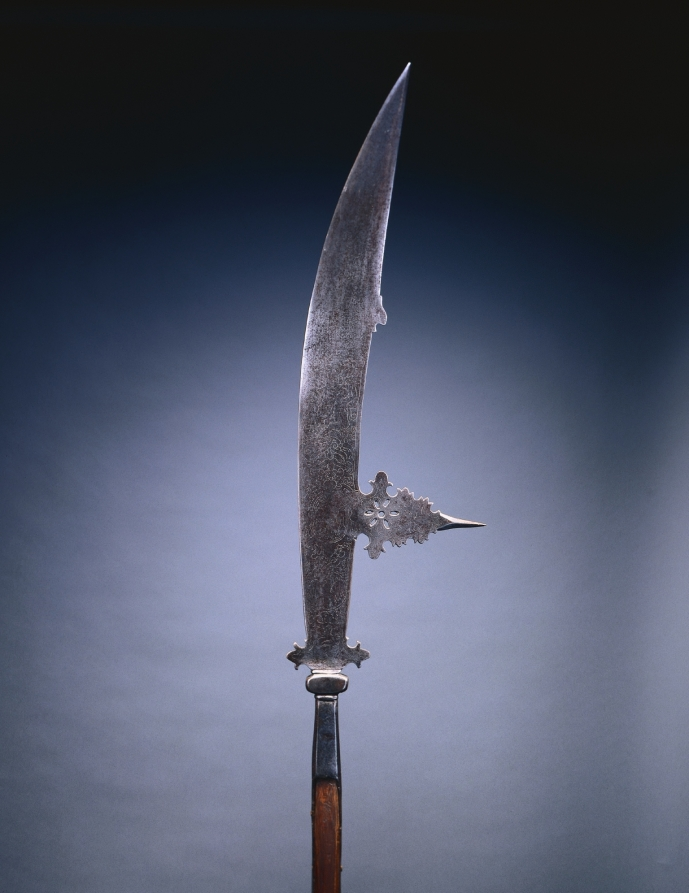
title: Glaive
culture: Italy, Venice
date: c. 1600–20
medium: steel, etched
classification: Arms and Armor